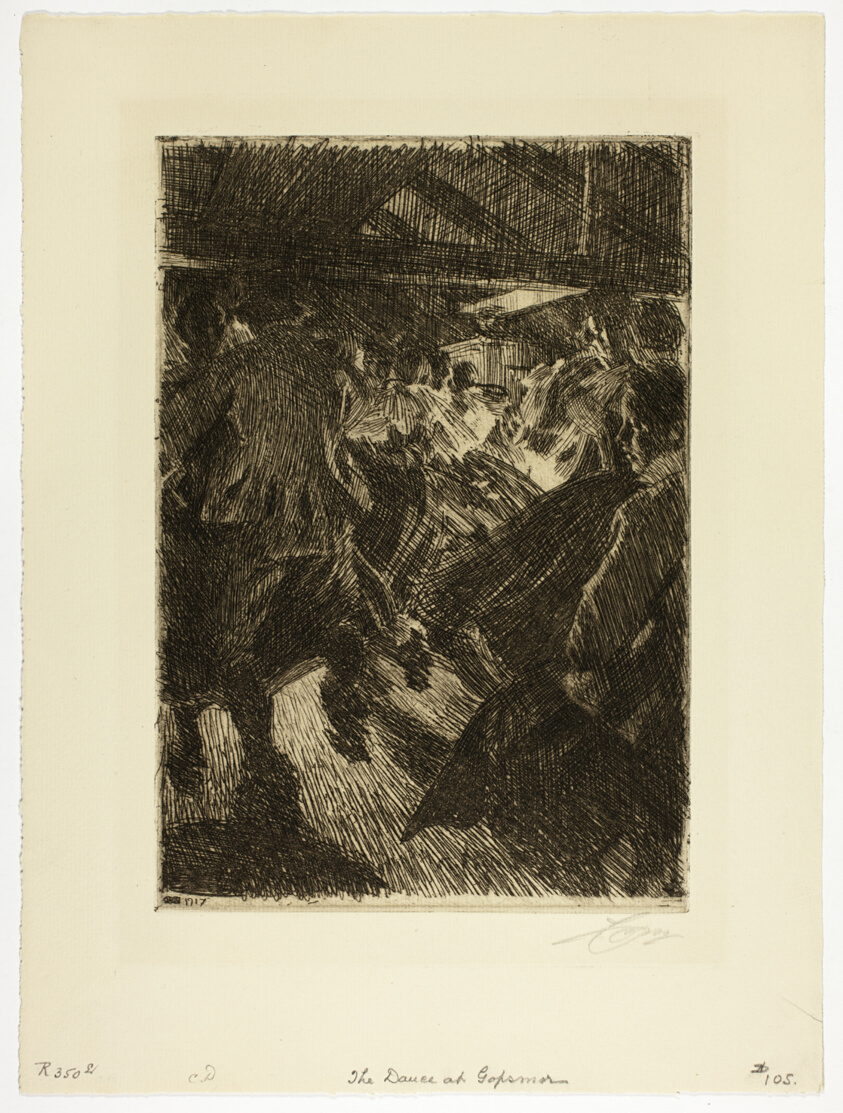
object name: Print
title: Gopsmor Cottage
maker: Anders Zorn (Swedish, 1860-1920)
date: 1917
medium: Etching in black on ivory laid paper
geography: Sweden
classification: etching; paper; print; prints and drawing